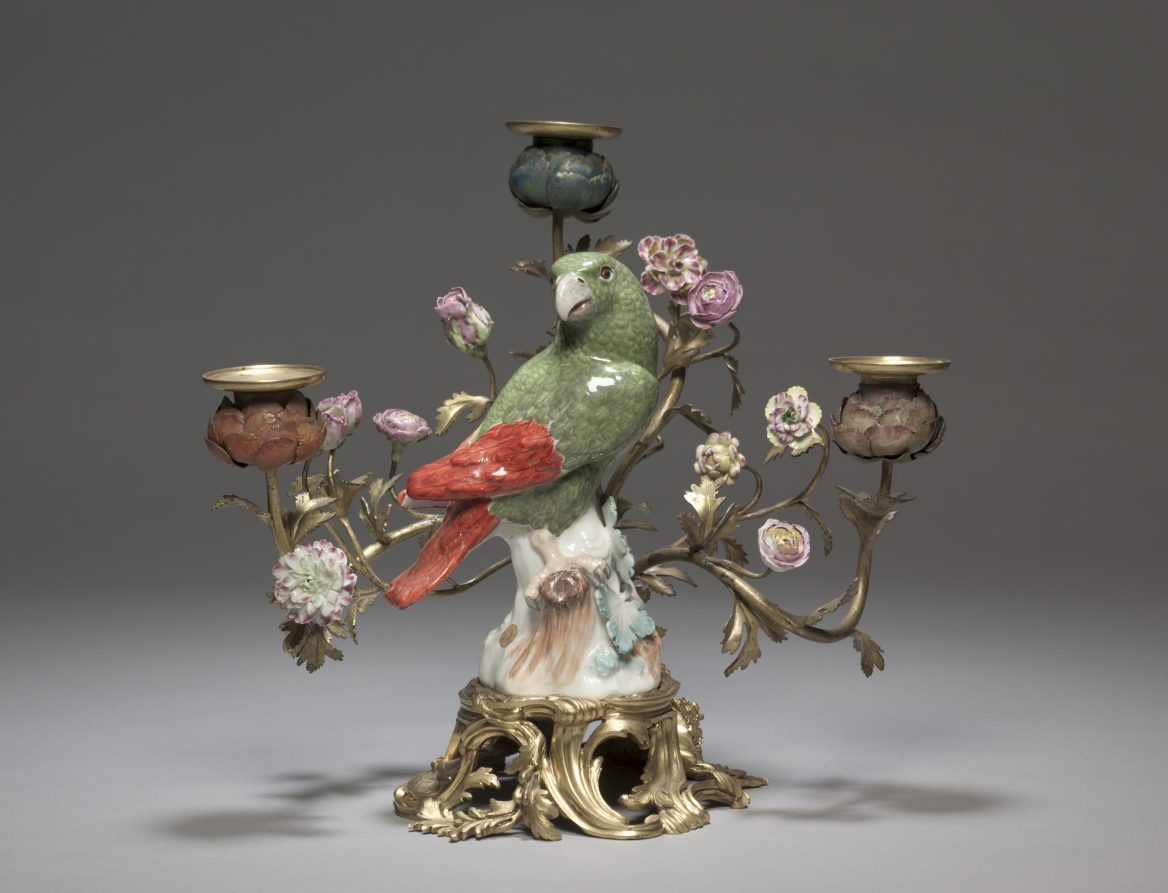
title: Candelabrum with Parrot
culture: Germany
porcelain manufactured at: Meissen Porcelain Factory (German, est. c. 1710)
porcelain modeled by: Johann Joachim Kändler (German, 1706–1768)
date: c. 1740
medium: porcelain mounted in gilt bronze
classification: Ceramic